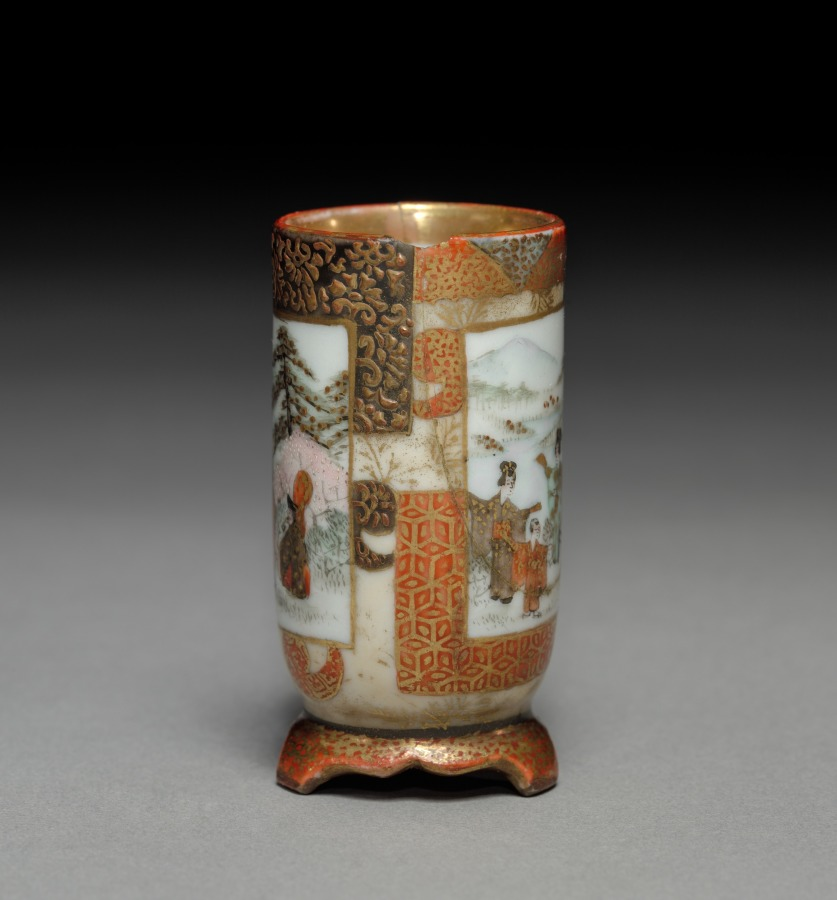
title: Miniature Vase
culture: Japan, Edo period (1615–1868) to Meiji period (1868–1912)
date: 1800s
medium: overglaze porcelain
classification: Ceramic